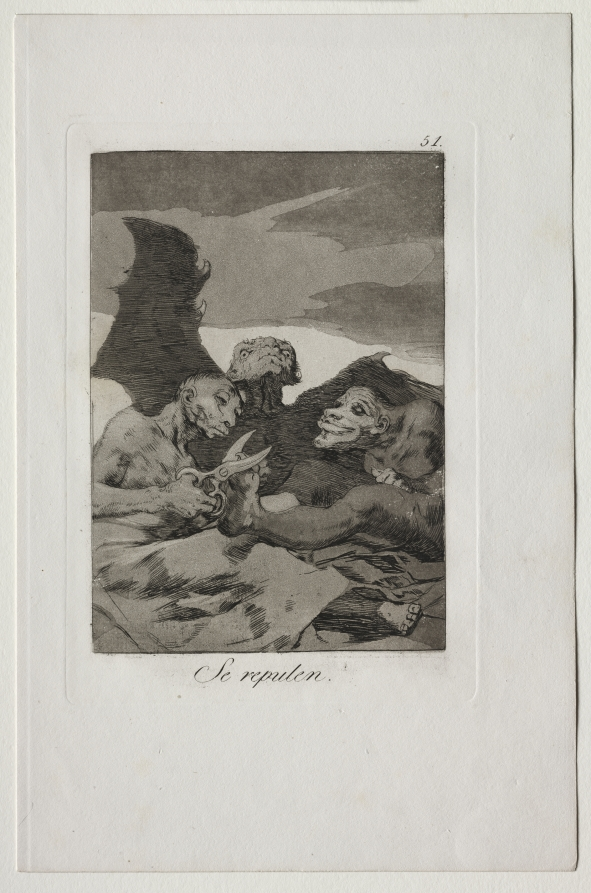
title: They Spruce Themselves Up, Plate 51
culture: Spain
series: Los Caprichos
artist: Francisco de Goya (Spanish, 1746–1828)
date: 1799 (printed c. 1855)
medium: etching and aquatint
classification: Print